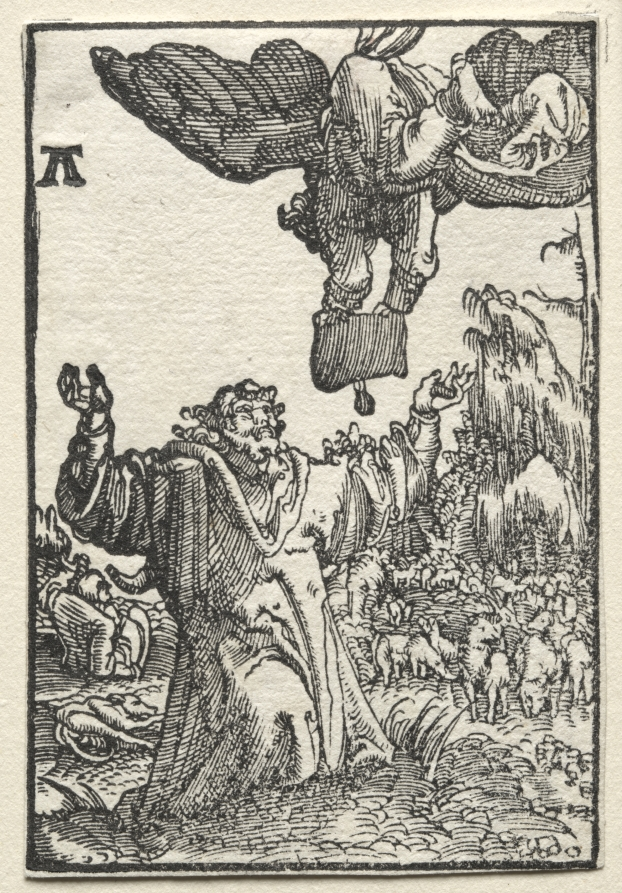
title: The Fall and Redemption of Man: The Message of the Angel to Joachim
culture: Germany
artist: Albrecht Altdorfer (German, c. 1480–1538)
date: c. 1515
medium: woodcut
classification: Print